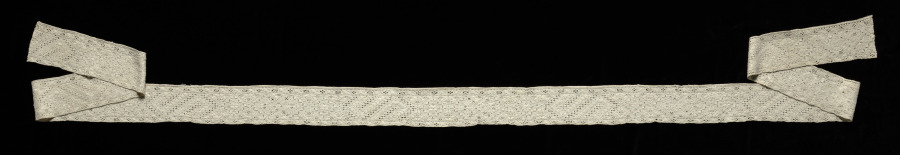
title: Lace Band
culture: Italy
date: 1500s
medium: Linen: needle lace (cutwork) and embroidery (satin stitch and curl stitch)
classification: Lace